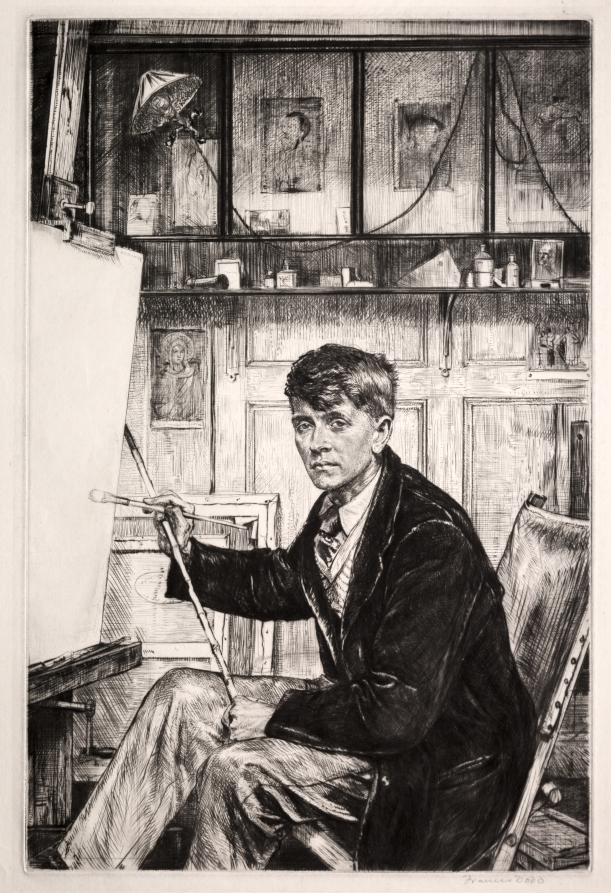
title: Charles Cundall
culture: England, 20th century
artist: Francis Dodd (British, 1874–1949)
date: 1926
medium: drypoint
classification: Print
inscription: Lower margin, in graphite: Francis Dodd